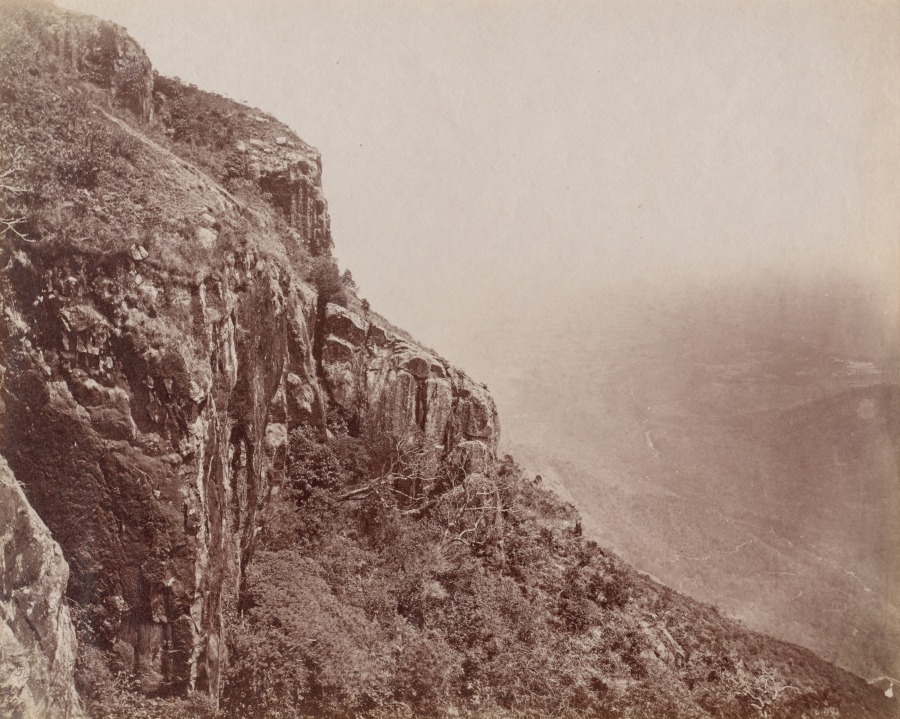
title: Cliffside, India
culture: Britain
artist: Albert Thomas Watson Penn (British, 1849–1924)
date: c. 1880s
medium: albumen print from collodion negative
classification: Photograph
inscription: Written in pencil on verso: "Albert Thomas Watson Penn"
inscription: Written in pencil on verso: "219"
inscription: Written in pencil on verso: "IWD-06 1000-"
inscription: Imprinted in photo in lower left on recto: "Penn/219"